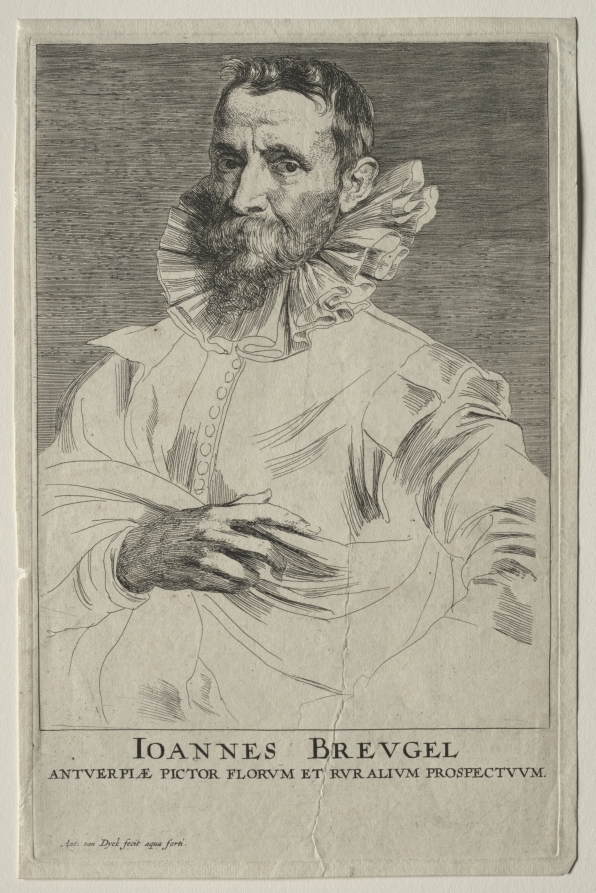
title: Jan Brueghel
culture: Flanders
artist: Anthony van Dyck (Flemish, 1599–1641)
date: 1630–33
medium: engraving and etching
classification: Print